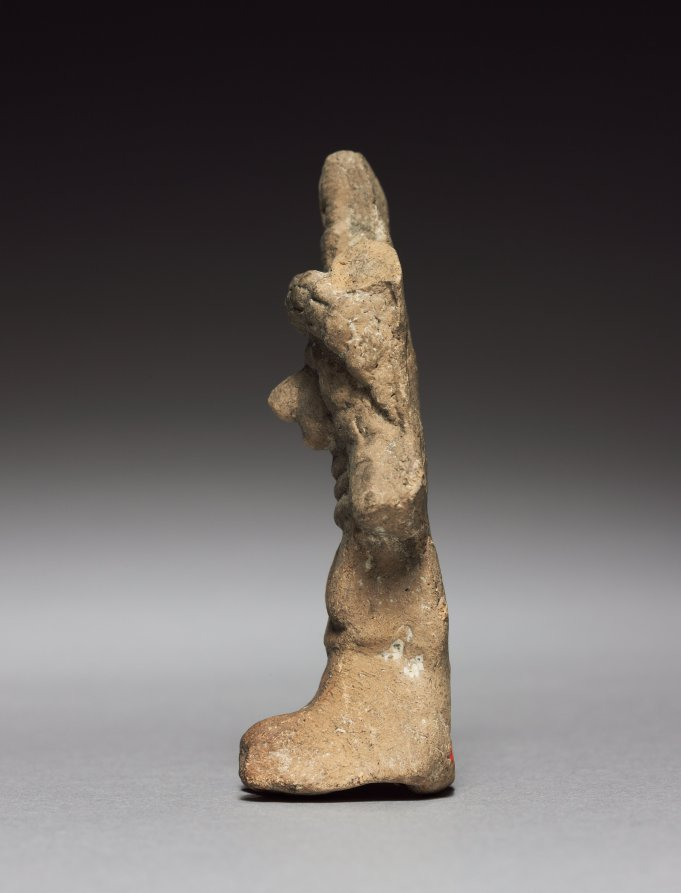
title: Figurine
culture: Mexico, Aztec, 14th century-16th century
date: 1325–1521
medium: terracotta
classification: Ceramic